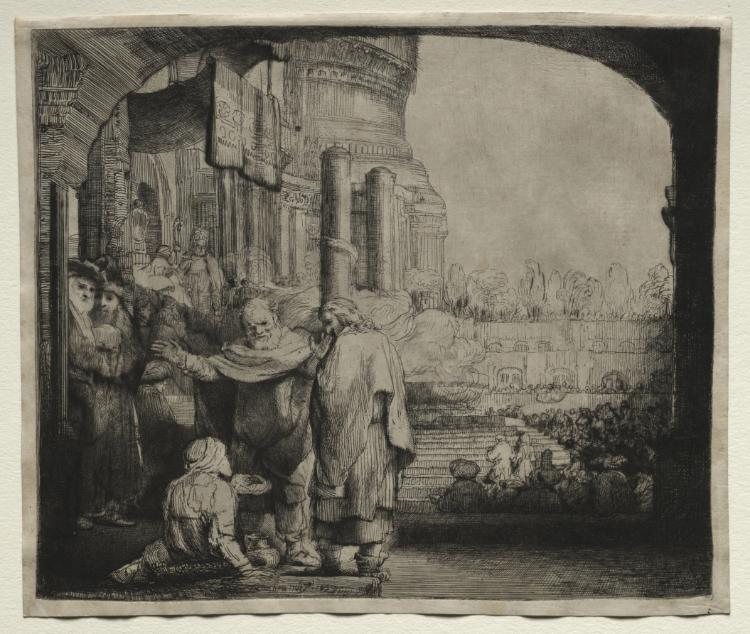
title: Peter and John Healing the Cripple at the Gate of the Temple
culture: Netherlands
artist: Rembrandt van Rijn (Dutch, 1606–1669)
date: 1659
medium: etching and drypoint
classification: Print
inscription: lower center, in plate: Rembrandt f·1659·